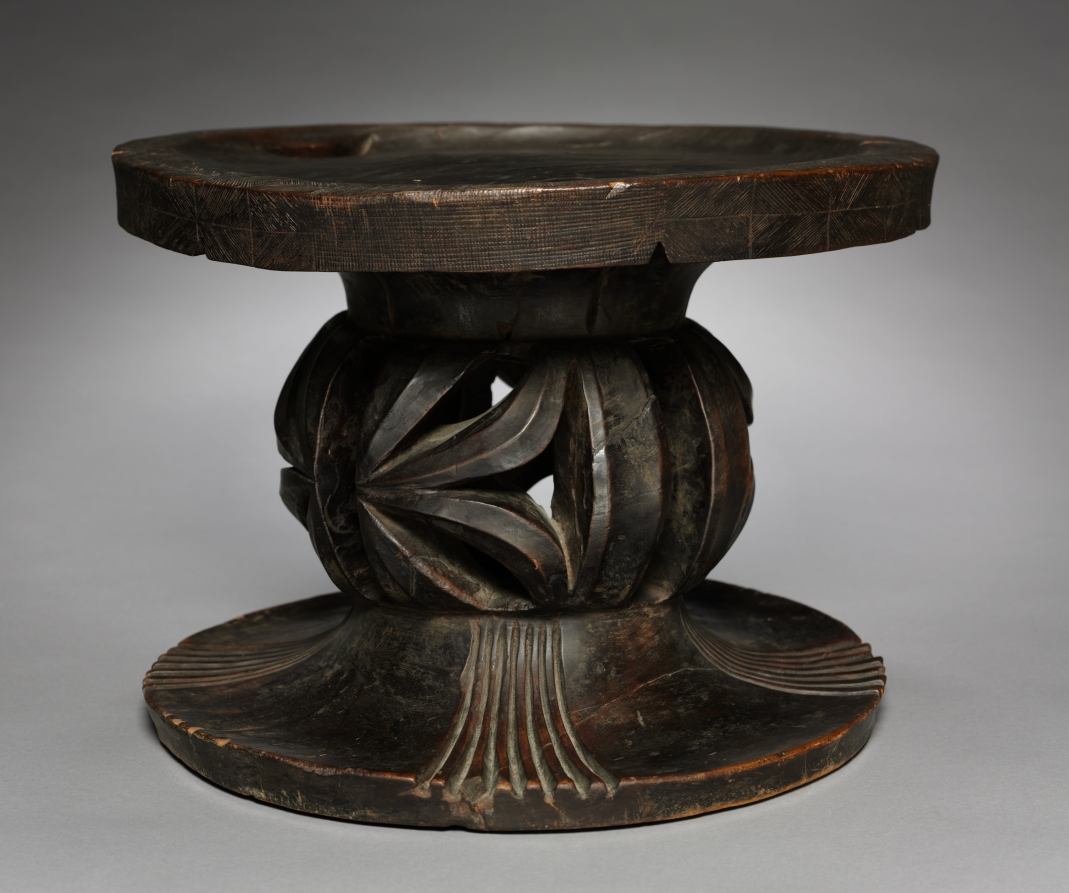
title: Stool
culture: Africa, Central Africa, Democratic Republic of the Congo, Mangbetu-style maker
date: by 1928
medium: wood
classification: Furniture and woodwork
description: Such stools were highly prized by their female owners. Sculpted by master artists with widespread reputations, they were often "signed" with a deeply cut mark on the base. This groove was then filled with red camwood as an expression of blessings and good wishes for the stool's owner.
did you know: In 1928, Paul Travis photographed the Mangbetu queen who once owned this stool as she sat on it.